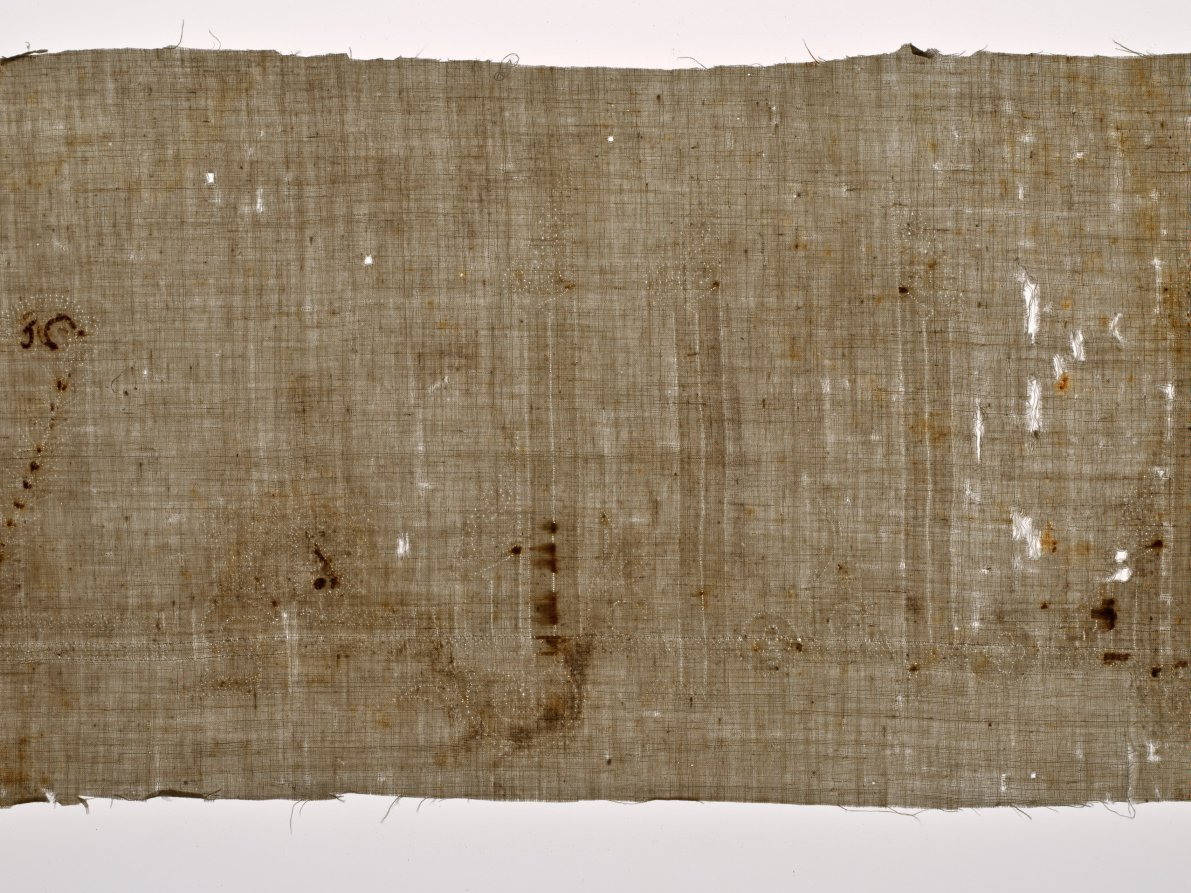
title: Tiraz of Caliph ‘Abd al-Rahman III, from the reliquary of Santa Librada, Cathedral of Seqüenza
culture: Spain, Cordoba, Spanish Umayyad period (756–1031)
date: 941–42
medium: Linen; silk: embroidery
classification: Embroidery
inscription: only the traces of a very large-scale elaborately foliated Kufic inscription preserved, largely in the form of needle holes but with a few small areas where the stitches are intact. This is approximately the second half of the original full inscription, which measured well over two meters long; the bulk of the original textile with the first half of the inscription was formerly preserved in the Cathedral of Siquenza. As preserved on the two fragments, the full inscription reads: "[Commander of the Be]lievers al-Masir li-Din al-Muslimin, may God support him! That which was made through the agency of Durri, his servant, in the year thirty and three hundred."